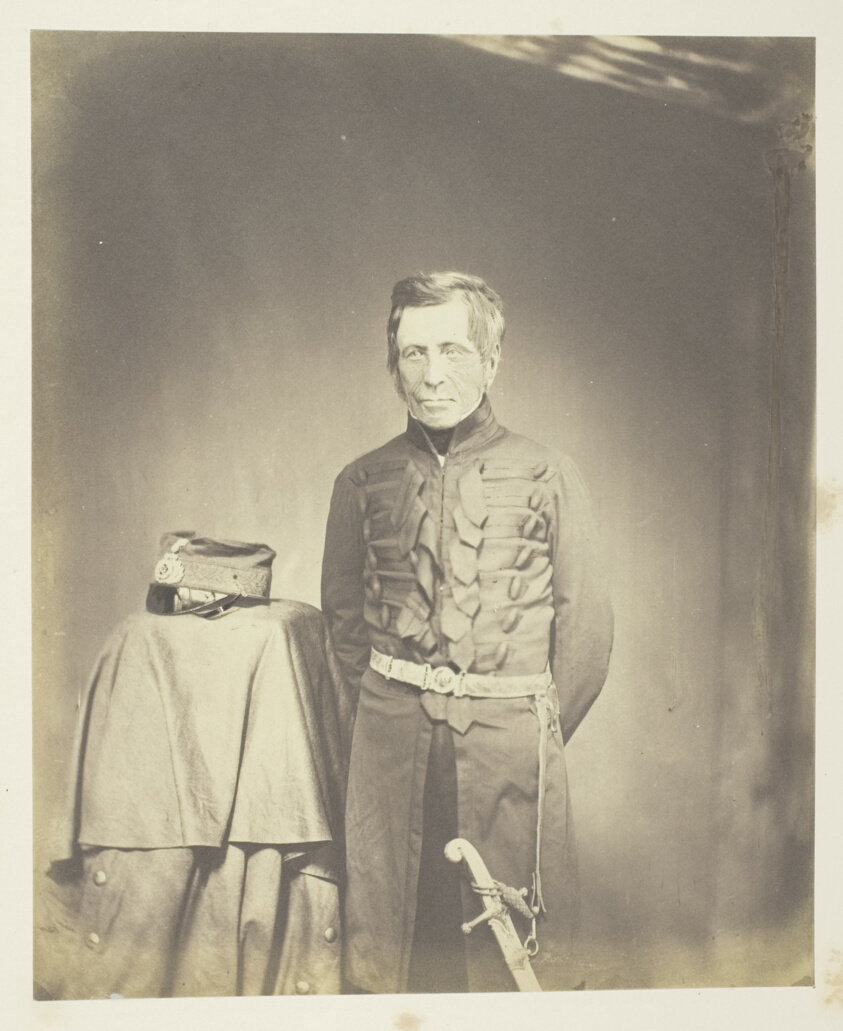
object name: Photograph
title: General Sir J. Burgoyne, Bart. G.C.B.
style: 19th century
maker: Roger Fenton (English, 1819–1869)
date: 1855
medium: Salted paper print, plate 38 from the album "Photographs Taken in the Crimea" (1856)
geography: England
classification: salted paper print; photographic process; photography; photograph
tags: Collected by Hugh Edwards, Crimea 1856